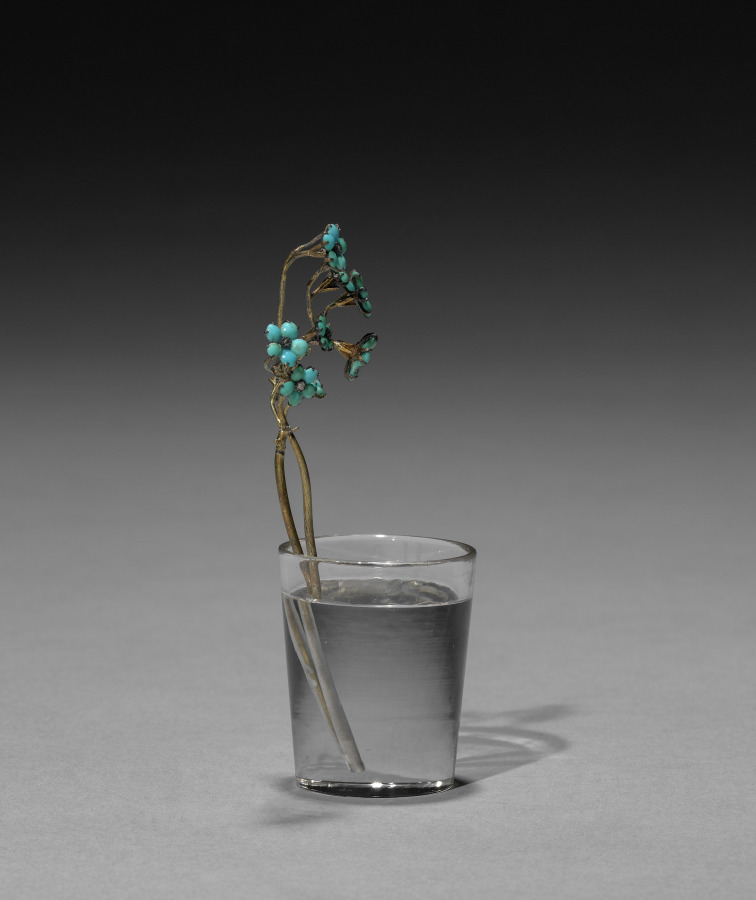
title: Flower Study of Forget-Me-Nots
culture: Russia, St. Petersburg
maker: House of Fabergé (Russian, 1842–1918)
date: c. 1885–1915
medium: turquoise, diamonds, rock crystal, silver gilt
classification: Miscellaneous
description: These delicate flowers, resembling a bouquet of forget-me-nots, are composed of finely rounded turquoise stones set around rose-cut diamonds on silver-gilt stems placed in rock crystal pots. Fabergé’s inspiration for his flower studies is said to have come from the floral brooches of precious stones that were made in the 1700s for Catherine the Great as well as from the Japanese art of flower arranging, known as ikebana. Fabergé’s flower studies were given as intimate gifts to friends by the tsarina and others in the court. She also liked to take them around to wherever the imperial family was residing as a reminder of spring during the harsh Russian winters.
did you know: The stems of Fabergé’s flower studies are set into little basins carved from rock crystal to resemble pots of water.